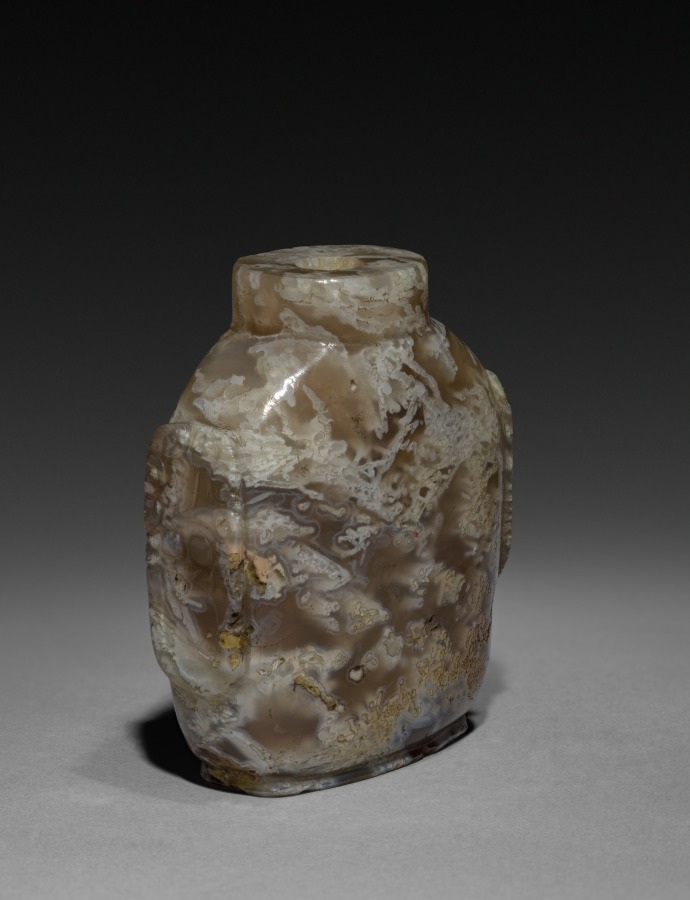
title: Snuff Bottle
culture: China, Qing dynasty (1644-1911)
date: 1644–1911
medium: glass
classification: Glass